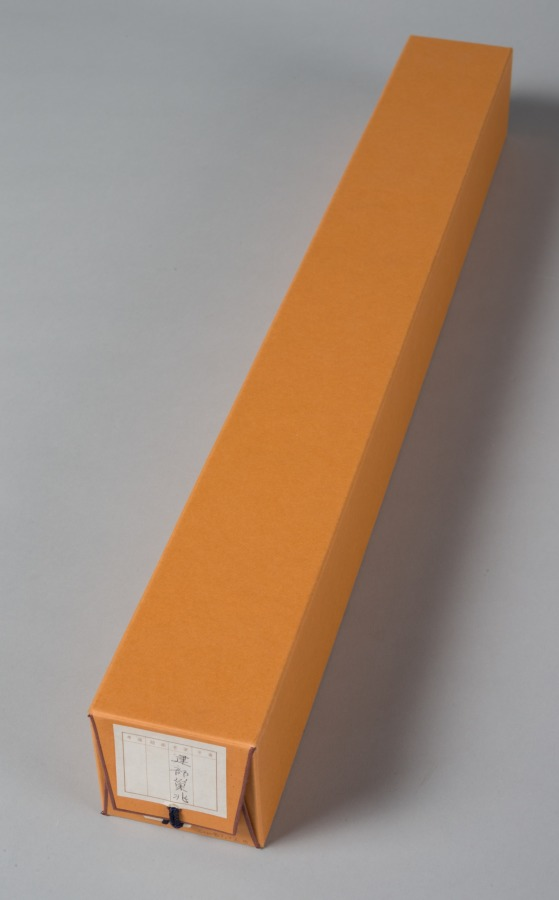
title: Genre Figures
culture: Japan, Edo period (1615–1868)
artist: Takebe Sōchō (Japanese, 1760–1814)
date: c. 1816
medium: hanging scroll; ink and color on paper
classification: Painting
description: Though rarely mentioned in official histories, Sōchō was an accomplished painter whose talent is readily apparent to the modern eye. For his compositions he chose traditional Japanese stories or everyday events. This scroll is part of a triptych of paintings converted from the folding screen format into the hanging scroll format.